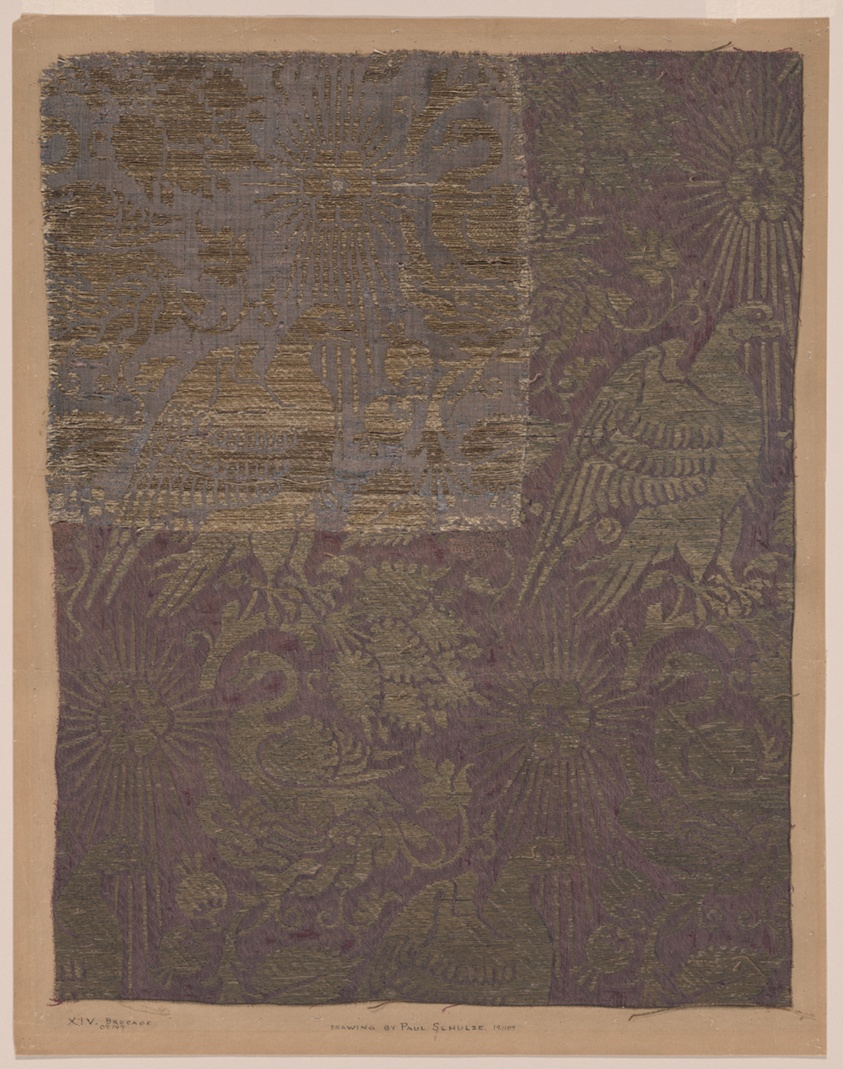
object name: Textile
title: Fragment Supplemented with Drawing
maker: Paul Schulze; Italy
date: 14th century and 19th century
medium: Watercolor with opaque and metallic gold watercolor over pen and crimson and black ink with a swatch of compound twill satin, plain weave, on brown wove paper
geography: Italy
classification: textile; weaving